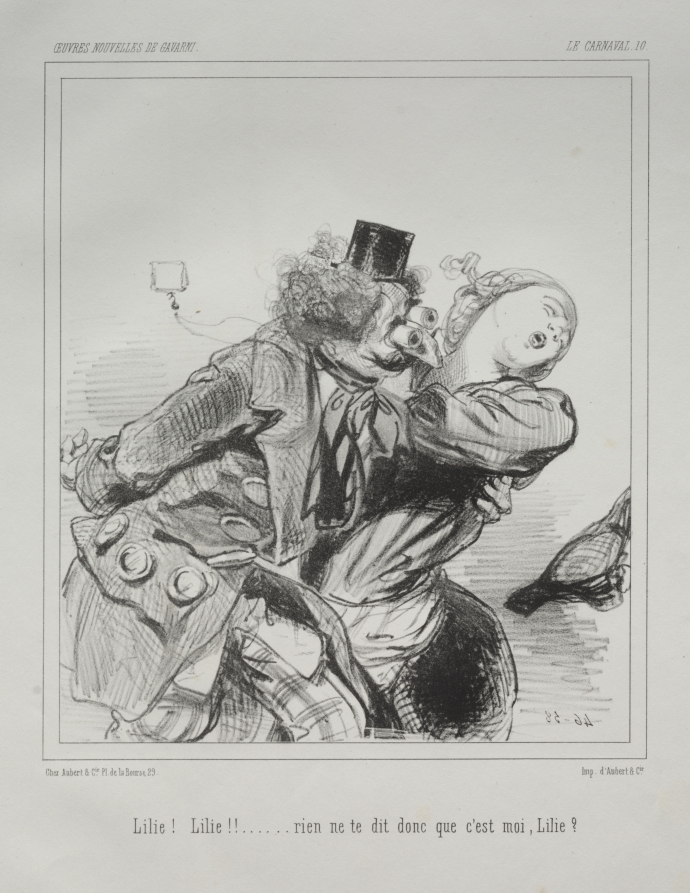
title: Carnaval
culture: France, 19th century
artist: Paul Gavarni (French, 1804–1866)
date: c. 1841–47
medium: lithograph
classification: Print